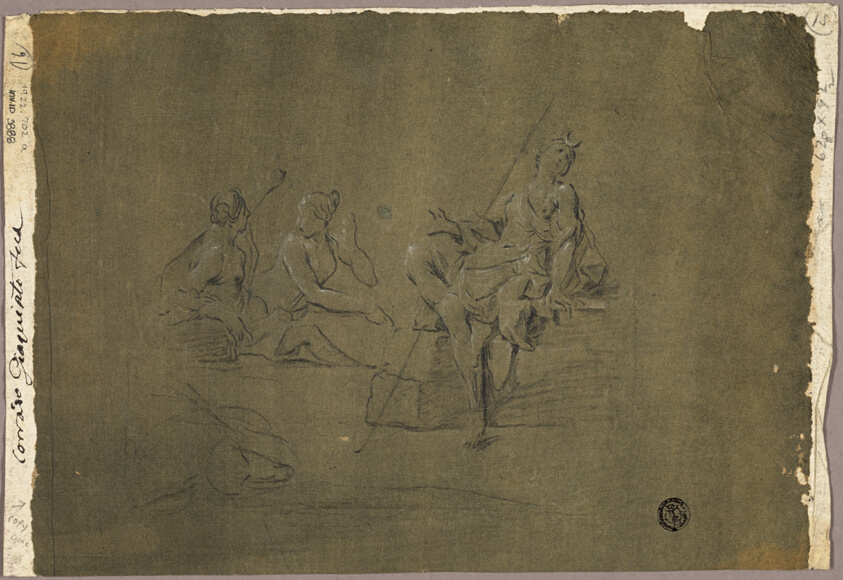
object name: Drawing and Watercolor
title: Return of the Prodigal Son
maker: Attributed to Alessandro Magnasco (Italian, 1667-1749); or the style of Francesco Monti (Italian, 1685-1768); after Corrado Giaquinto (Italian, 1693/99-1765)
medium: Black chalk heightened with touches of white chalk on brown tinted laid paper, laid down on ivory laid paper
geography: Italy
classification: graphite; drawings (visual works); prints and drawing